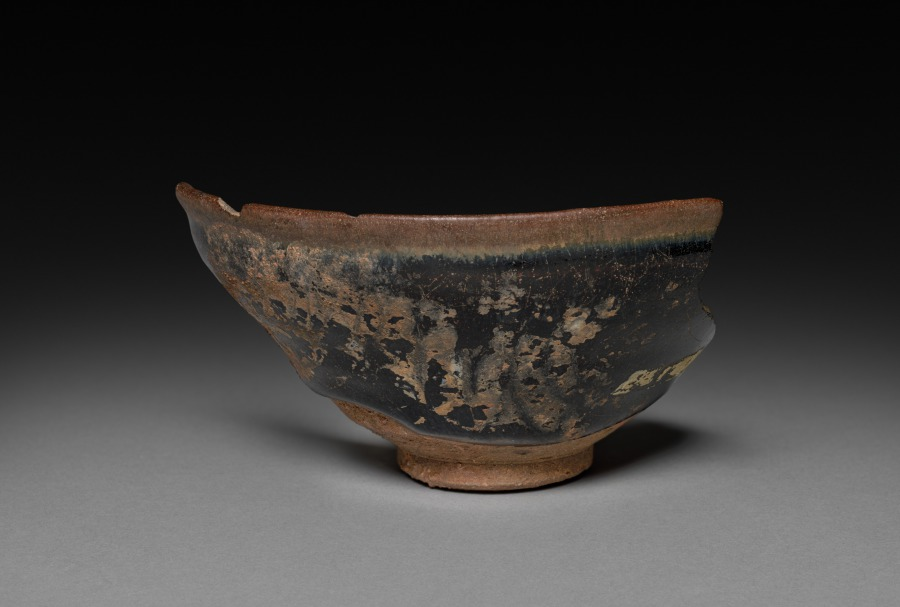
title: Shard of Tea Bowl: Jian ware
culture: China, near Shui ch'i, Song dynasty (960-1279)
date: 960–1279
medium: stoneware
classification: Ceramic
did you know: Jian ware was made of a very hard, coarse grain.